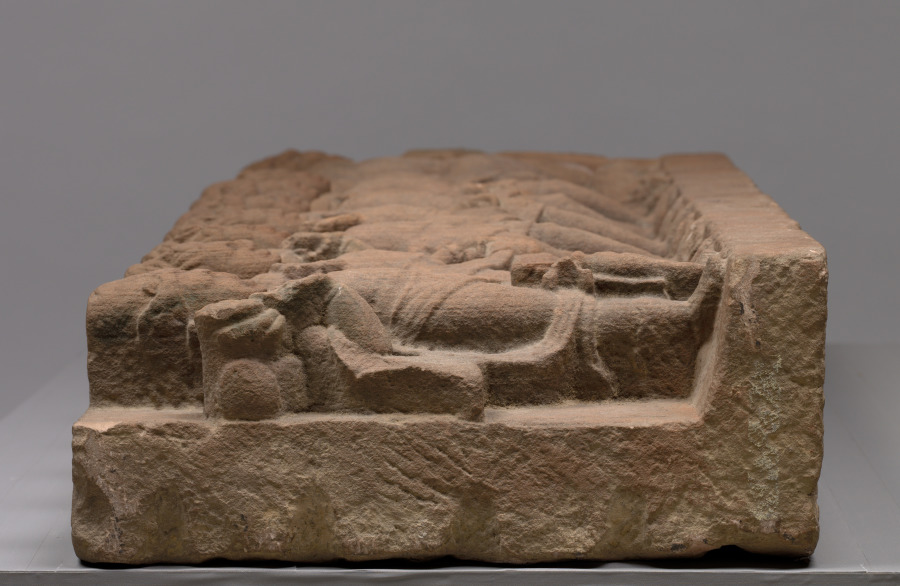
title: Nine Celestial Bodies (Navagraha)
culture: Central India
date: 700s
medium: Sandstone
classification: Sculpture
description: Near temple entrances, the nine celestial bodies were depicted in an orderly row, often in figural form. From left to right they are: Sun with a tall crown and the female Dawn in front of him. The next five figures are nearly identical: Moon, Mercury, Venus, Mars, and Jupiter. As a portent of doom, Saturn was wounded by a goddess to prevent him from moving swiftly, so he stands on one leg. The bodiless head is Rahu, the eclipse, who swallows the moon until it falls out his neck. The serpent-tailed figure is a comet.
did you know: The Sun (Surya) is the only figure who wears boots and holds fully open lotus flowers.